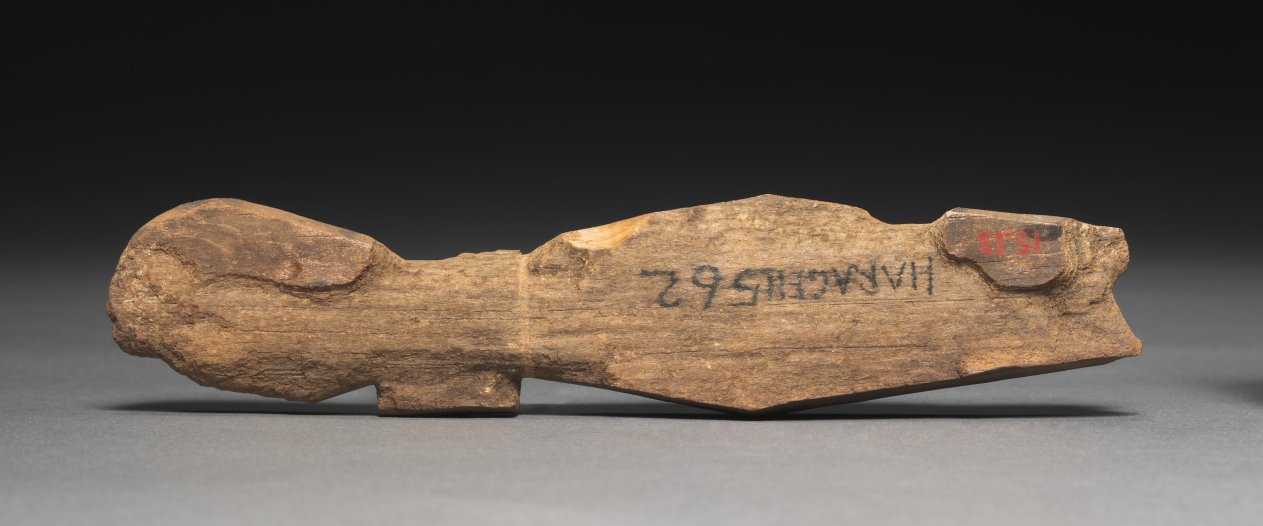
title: Fragment of a Cross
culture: Egypt, Greco-Roman period (332 BCE–395 CE), Roman empire (30 BCE–395 CE)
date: 30 BCE–395 CE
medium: wood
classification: Wood